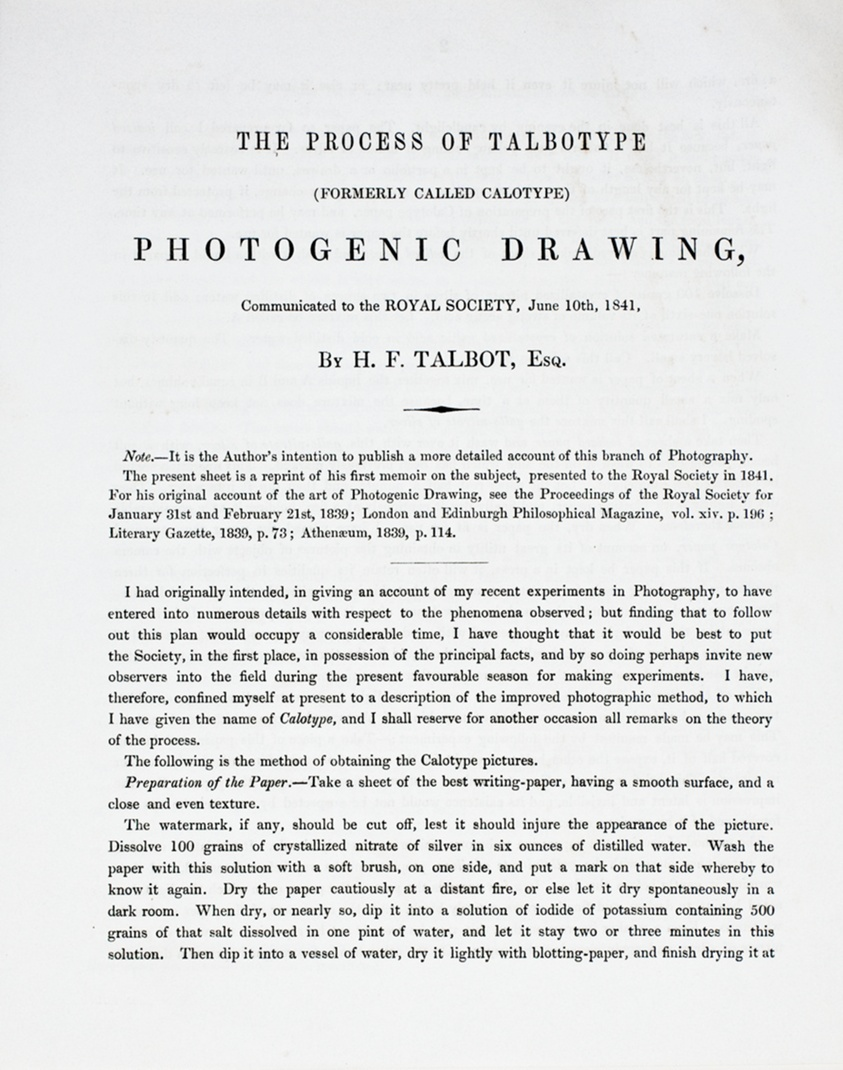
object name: Photograph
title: The Process of Talbotype (formerly called Calotype) Photogenic Drawing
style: 19th century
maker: William Henry Fox Talbot (English, 1800–1877)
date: Communicated to the Royal Society, June 10, 1841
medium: Four pages of unbound text (approximately 2500 words), printed by J. & H. Cox Brothers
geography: England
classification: ink on paper; printing process; photography; photograph